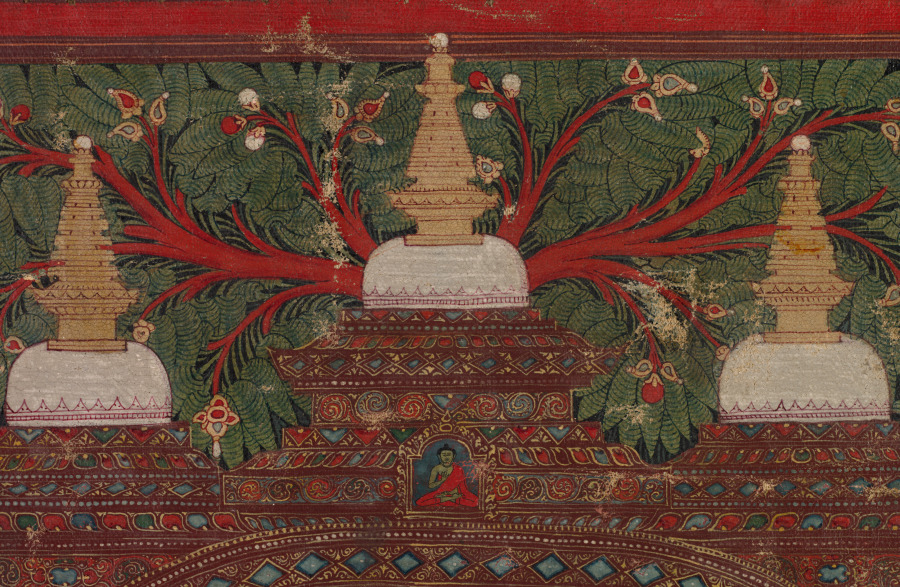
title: Green Tara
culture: Central Tibet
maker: attributed to Aniko (Nepalese, active in Tibet mid- to late 1200s)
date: c. 1260s; mounted, 2020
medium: thangka; gum tempera, ink, and gold on sized cotton; mount: silk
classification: Painting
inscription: Om Ah Hum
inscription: om tare tutare ture svaha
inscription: Om Ah Hum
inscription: Om Ah Hum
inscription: om ah sarva vyida svaha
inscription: ye dharmā hetuprabhavā he- tuṃ teṣāṃ tathāgato hy avadat teṣāṃ ca yo nirodha evaṃvādī mahāśramaṇaḥ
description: For Tibetans, Green Tara is one of the preeminent figures of their Buddhist faith, a radiant savioress who embodies the female form of the perfect, enlightened mind. The Green Tara in the Cleveland thangka—a Tibetan devotional painting on cloth—specifically dispels fear and provides protection, just like her mantra inscribed on the back side of the painting. Her green color and fear-not gesture link her to the cosmic Buddha of the North, enshrined above her head. Most scholars agree that this work was painted by the celebrated Nepalese artist known as Aniko.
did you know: The tiny monastic figure under Green Tara's right hand commissioned the painting.